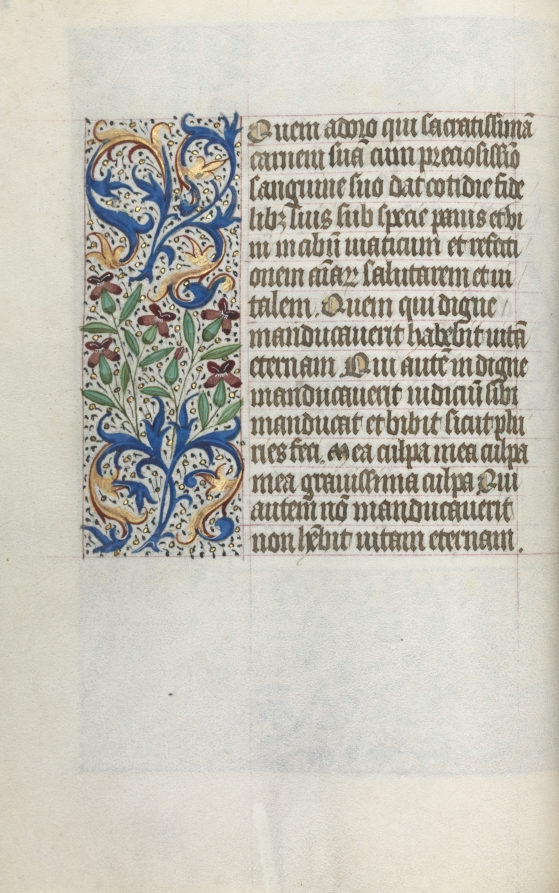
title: Book of Hours (Use of Rouen): fol. 23v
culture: France, Rouen, 15th century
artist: Master of the Geneva Latini (French, active Rouen, 1460–80)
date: c. 1470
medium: ink, tempera, and gold on vellum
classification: Bound Volume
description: In the late 1400s and early 1500s Rouen was an established and important center of book production. The city’s cathedral had a wealthy chapter that spent large sums of money to commission books and to maintain its extensive library. The stationers and booksellers would have likely been concentrated in or near the cathedral precinct. This artist, named after a manuscript now in Geneva, was Rouen’s principal illuminator during the second half of the 1400s.